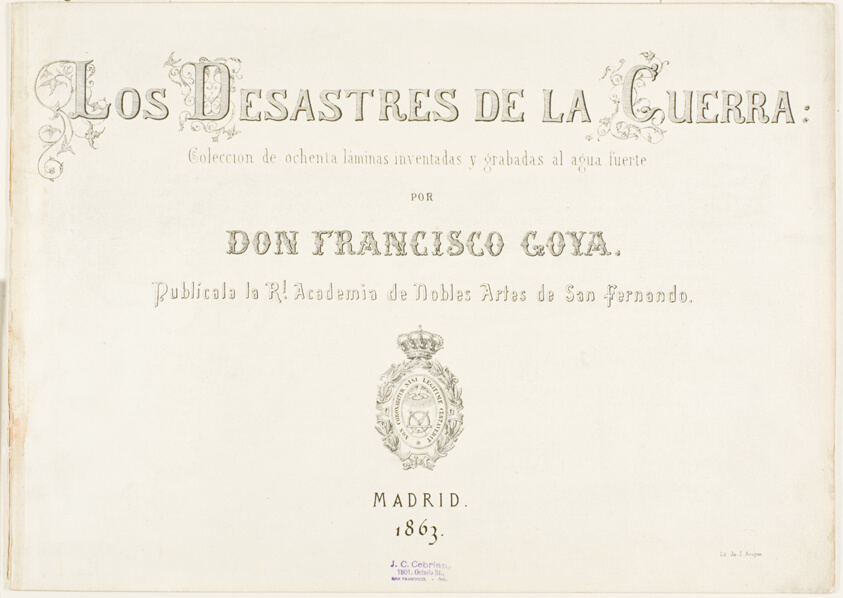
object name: Print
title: Title Page and biographical introduction for The Disasters of War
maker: Francisco José de Goya y Lucientes (Spanish, 1746-1828)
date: 1863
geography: Spain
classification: etching; print; prints and drawing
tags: war